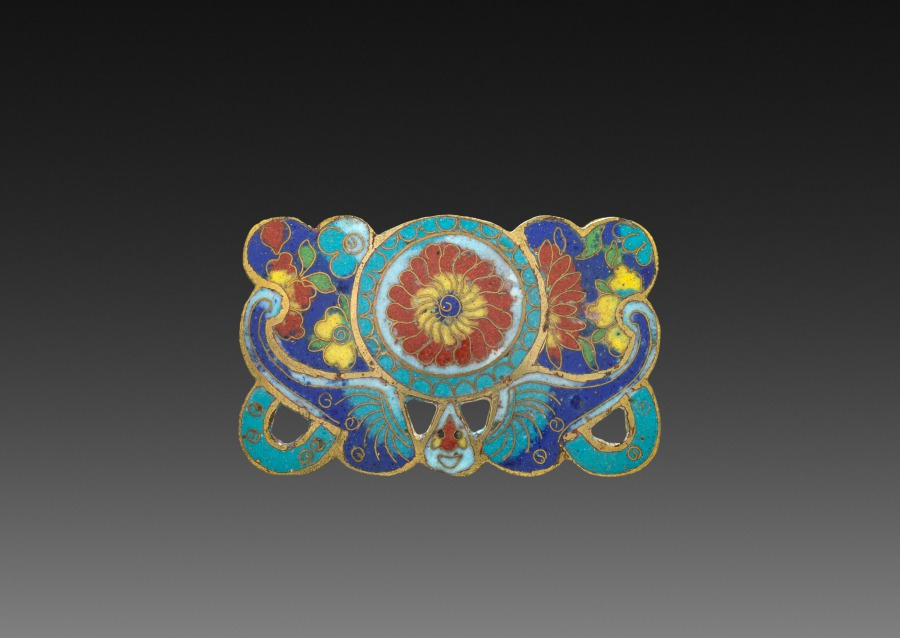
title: Belt Buckle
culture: Japan, Meiji period (1868–1912) or Taishō period (1912–26)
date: early 1900s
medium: cloisonne enamel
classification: Enamel